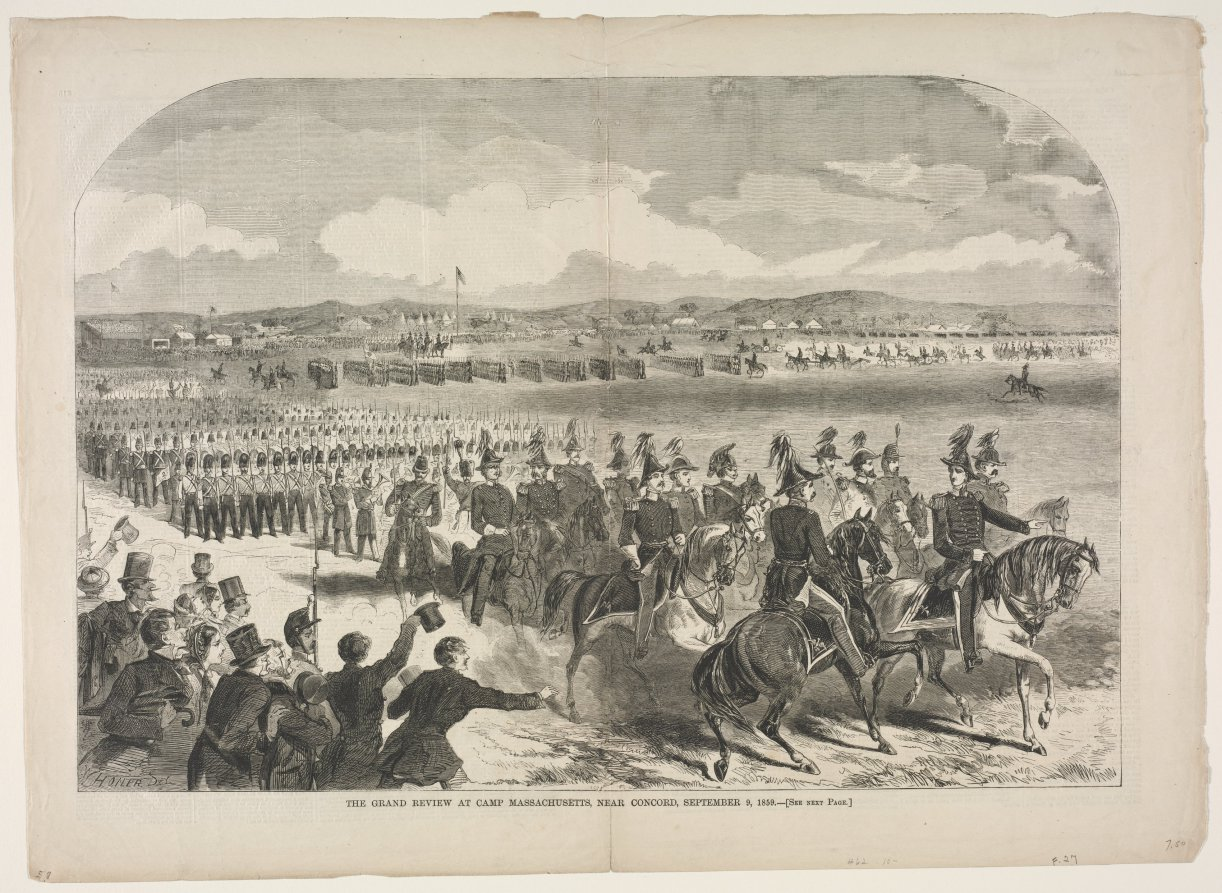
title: The Grand Review at Camp Massachusetts, near Concord, September 9, 1859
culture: America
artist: Winslow Homer (American, 1836–1910)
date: 1859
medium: wood engraving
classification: Print